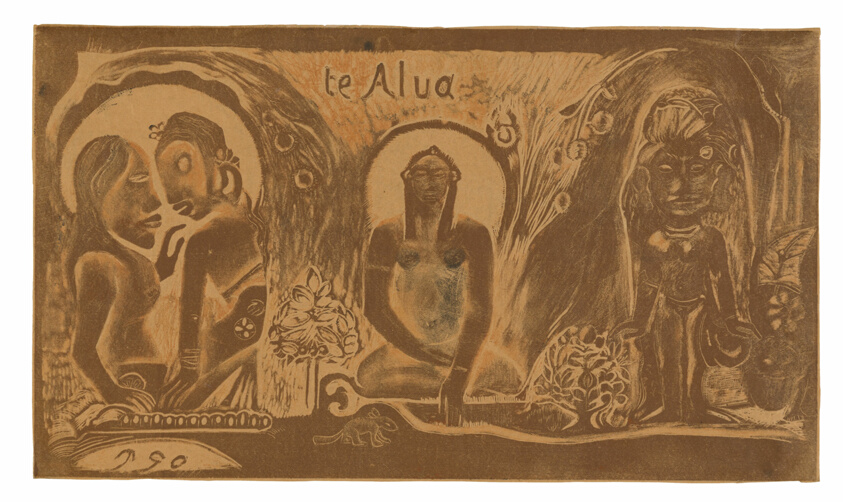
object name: Print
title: Te atua (The God), from the Noa Noa Suite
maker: Paul Gauguin (French, 1848-1903)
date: 1893/94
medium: Wood-block print, printed twice in orange and brown inks, over residual black ink, with wiping and touches of hand-applied black ink, on thin, pale-pink wove paper (faded to tan)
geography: France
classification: woodcut; print; prints and drawing